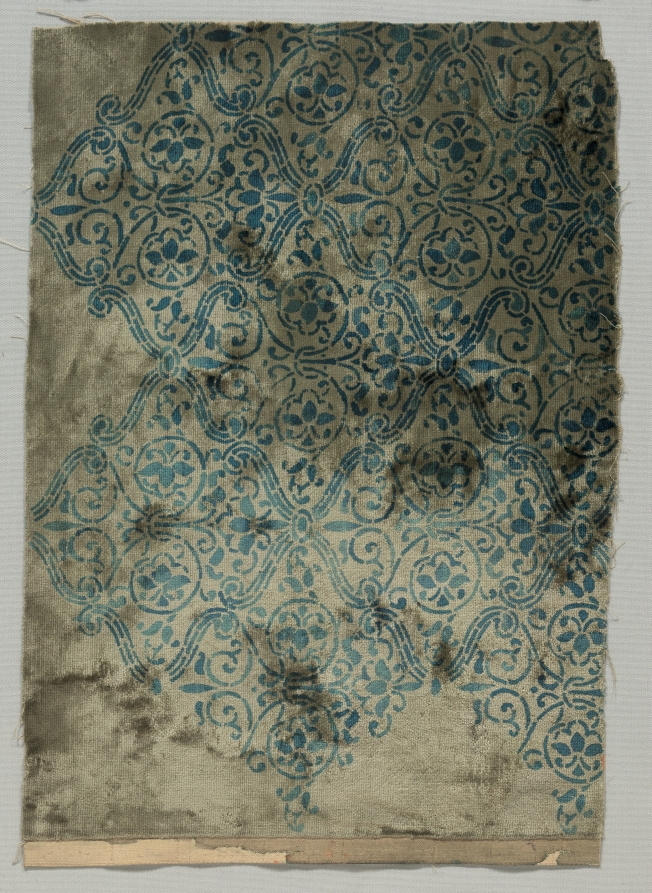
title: Stenciled Velvet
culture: America, New York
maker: Tiffany Studios (United States, New York, 1902–32)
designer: attributed to Dorothy Marshall Hornblower (American, 1886–1968)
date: c. 1902–10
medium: plain silk velvet stencilled with vegetable dyes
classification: Velvet